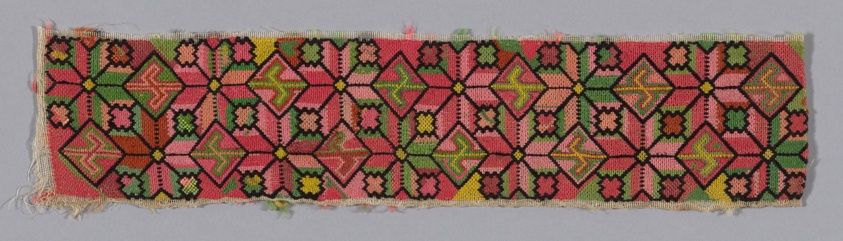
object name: Costume and Accessories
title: Band (for Woman's Trousers or Robe)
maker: China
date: 1875/1900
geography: China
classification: textile; needlework (visual works); costume - needlework; costume